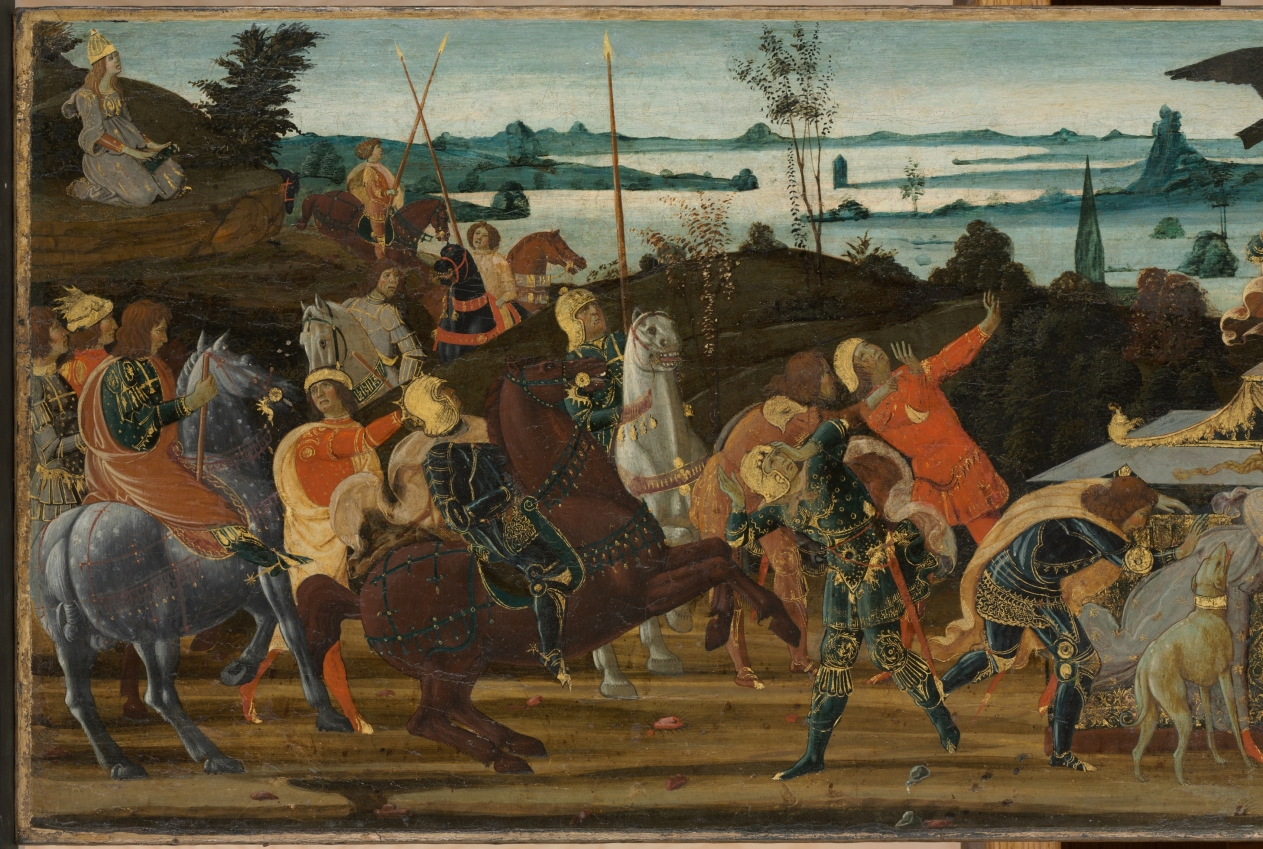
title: Tarquinius Priscus Entering Rome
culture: Italy, late 15th Century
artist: Jacopo del Sellaio (Italian, c. 1441–1493)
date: c. 1470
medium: tempera on wood, mounted on canvas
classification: Painting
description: Originally the front of a bridal chest, this panel was later removed and framed like a painting. At left, the Etruscan prophetess Tanaquil foresees her husband’s entry into Rome. En route, an eagle snatched his hat, then returned it as they approached the city, which Tanaquil interpreted as a good omen. Ancient triumphal processions, closely connected to ancient sarcophagi, were common subjects for bridal chests. Here Tanaquil is a model for a supportive, dutiful wife.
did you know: This painting utilizes continuous narrative; the same figures appear multiple times as the story unfolds from left to right.